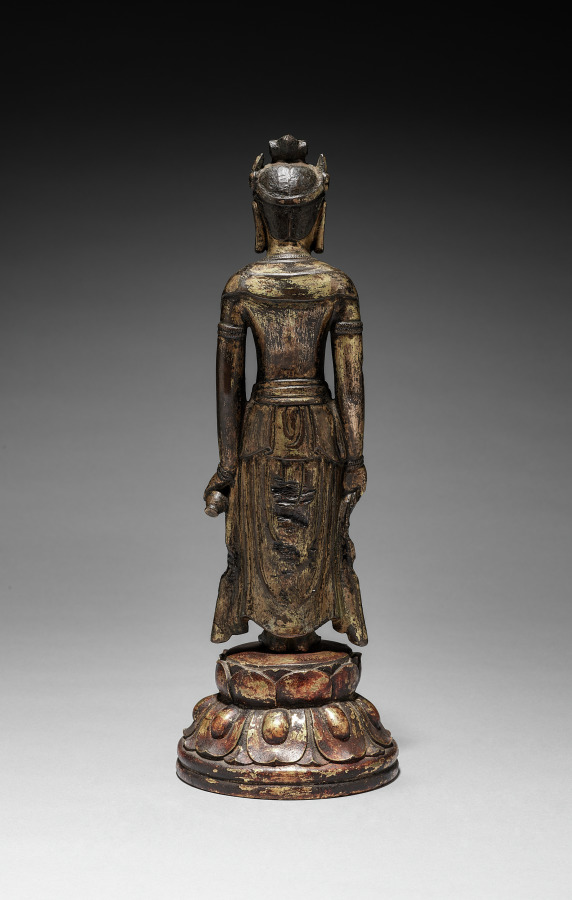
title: Kannon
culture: Japan, Asuka period (538–710)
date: mid-600s–early 700s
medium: gilt bronze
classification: Sculpture